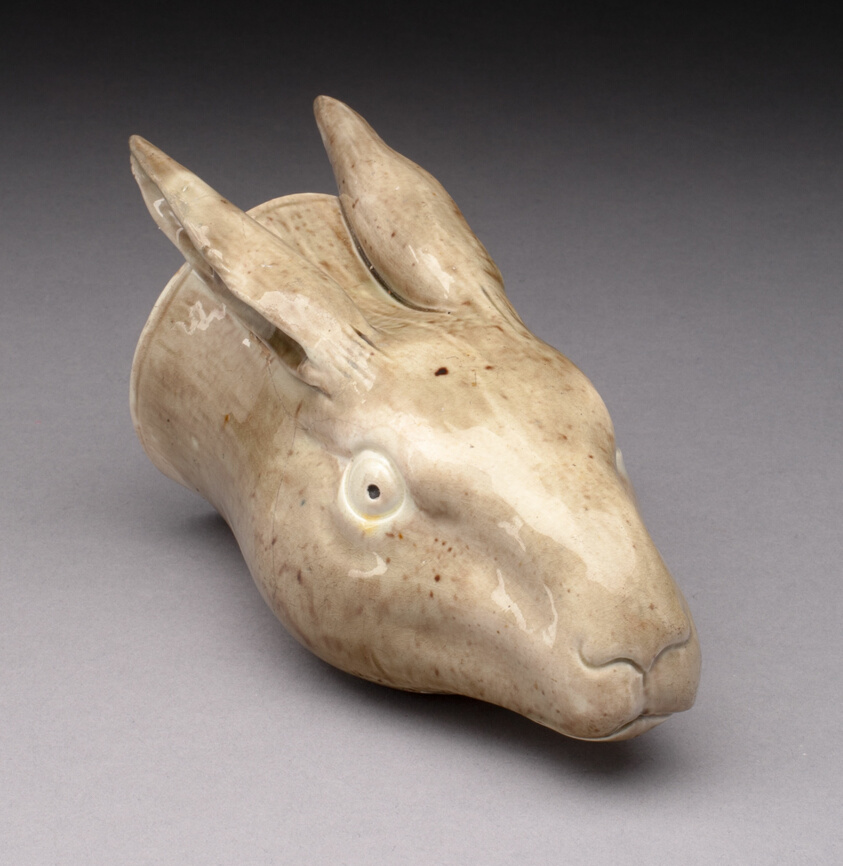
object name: Ceramics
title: Rhyton Cup in the Form of a Hare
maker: England, Staffordshire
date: c. 1780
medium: Lead-glazed earthenware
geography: Staffordshire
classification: drinking vessel; earthenware; european decorative arts; ceramics; lead-glazed earthenware